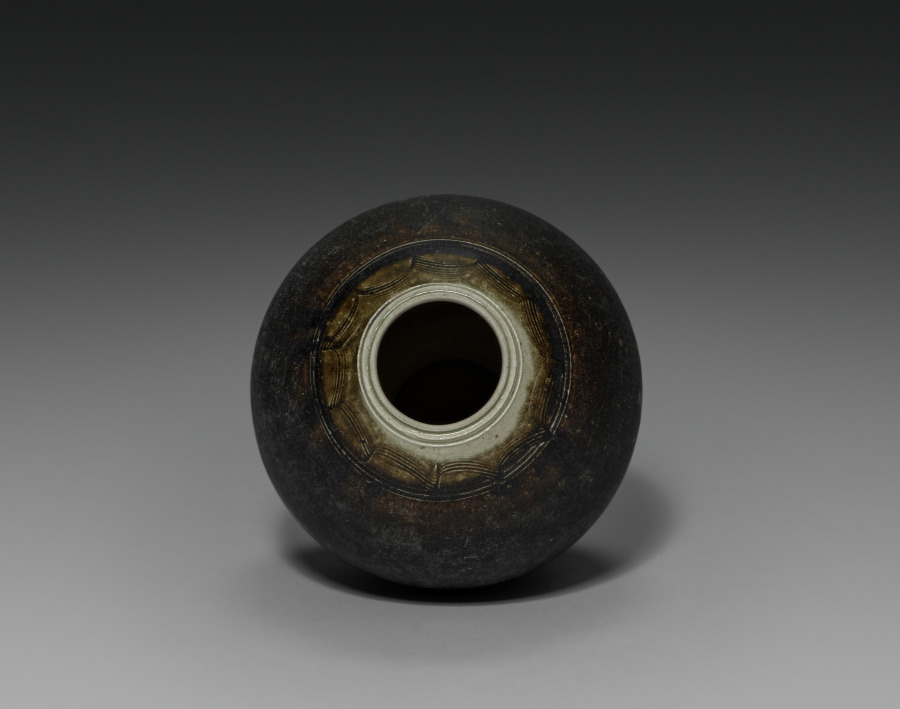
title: Jar in the Shape of a Fruit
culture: Cambodia, Northeast Thai kiln, Khmer Ware, Angkor Wat/Bayon period, 12th century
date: 1100s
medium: glazed pottery with brown slip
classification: Ceramic